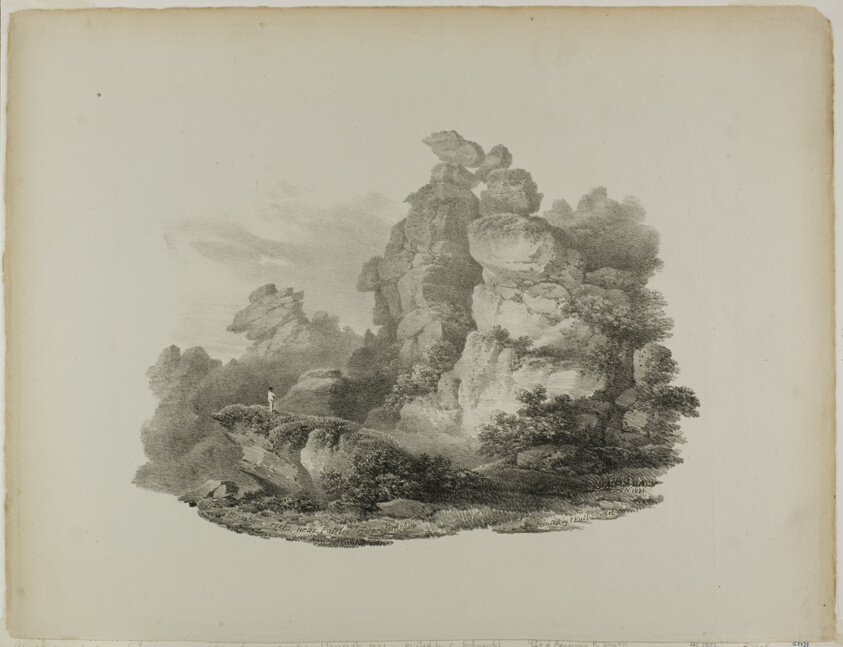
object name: Print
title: Brimham Rocks, near Pateley Bridge Yorkshire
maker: Francis Nicholson (English, 1753-1844)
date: 1821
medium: Lithograph on paper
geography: England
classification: lithograph; print; prints and drawing